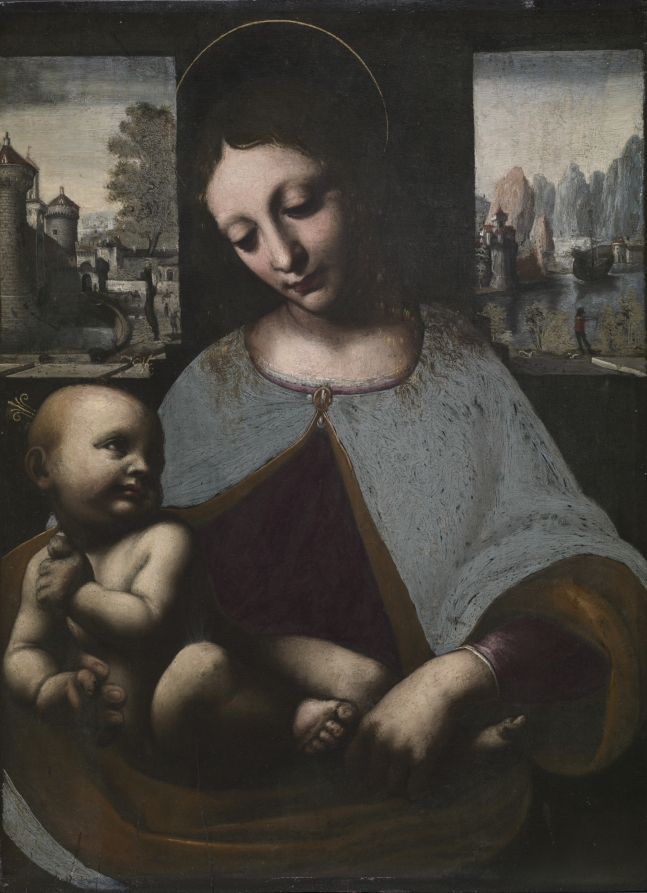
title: Virgin and Child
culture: Italy, early 16th Century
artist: circle of Leonardo da Vinci (Italian, 1452–1519)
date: c. 1500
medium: oil on wood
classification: Painting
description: Madonna and Child appear in half-length, seated against a dark wall. The Child's body is covered in shadow as he looks over his shoulder at his mother. This painting was bought by James Jackson Jarves as a Leonardo. The landscape and features of the figures are similar to Leonardo's Madonna of the Rocks, and in typical Leonardesque fashion, the figures' heads incline slightly to the left. However, Virgin and Child was later attributed to a member of Leonardo's circle named Francesco Napolitano (active 1500) because of its resemblance to his Madonna and Child with St. Sebastian and St. John the Baptist in Zurich, Switzerland. Virgin and Child has not been widely accepted as a work of Napolitano; however, he was certainly a member of Leonardo's circle. The Sforzesco Castle, the seat of Milan's ruling Sforza family, appears in the background. The castle's original Torre del Filarete, visible in this painting, was destroyed by lightning in 1521 and later rebuilt by Francesco II Sforza. The destruction of the tower establishes a date of about 1500 for this painting.